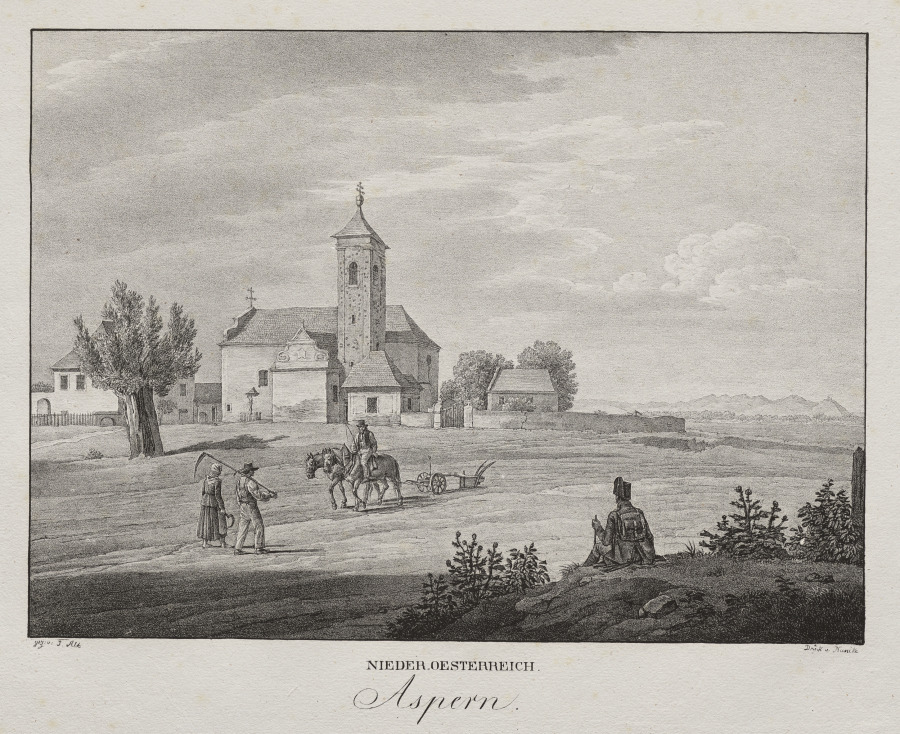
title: Nieder-oesterreich, Aspern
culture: Austria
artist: Jakob Alt (Austrian, 1789–1872)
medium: lithograph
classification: Print